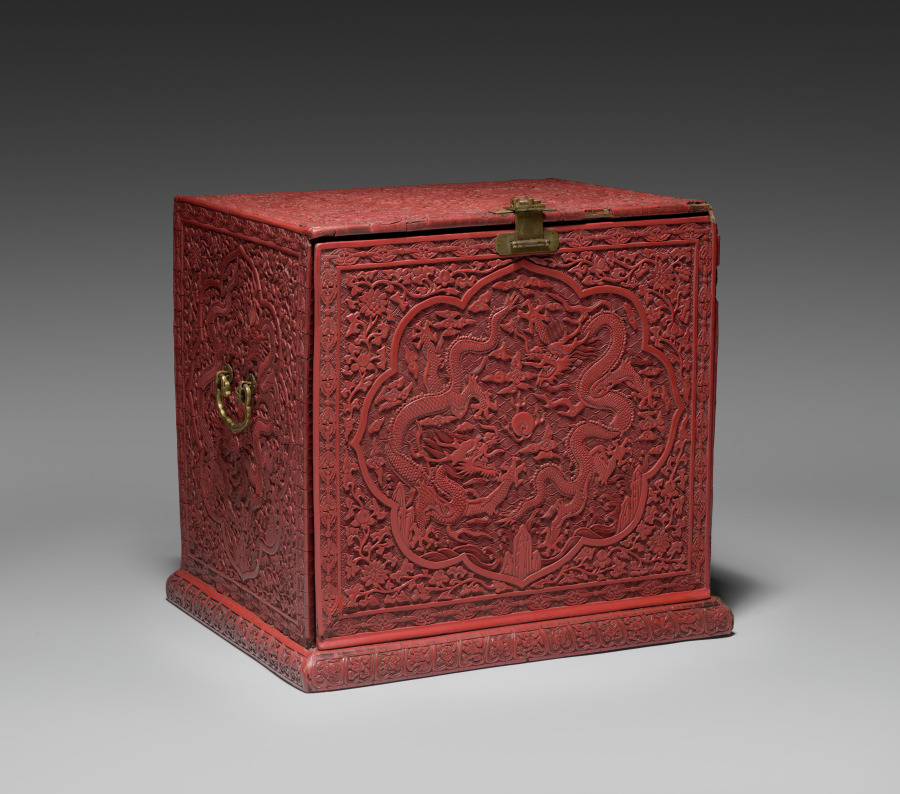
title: Tihong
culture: China, Ming dynasty (1368-1644), Wanli reign (1572-1620)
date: 1585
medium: carved cinnabar lacquer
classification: Lacquer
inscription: 大明萬曆乙酉年製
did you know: An inscription on the base of the chest dates it to 1585.